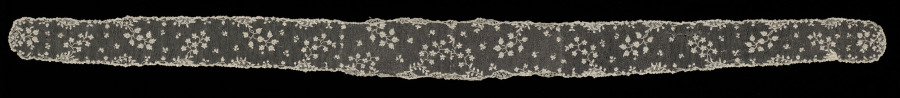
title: Lace Lappet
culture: France, Argentan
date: 1715–74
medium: Linen: needle lace (Argentan)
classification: Lace